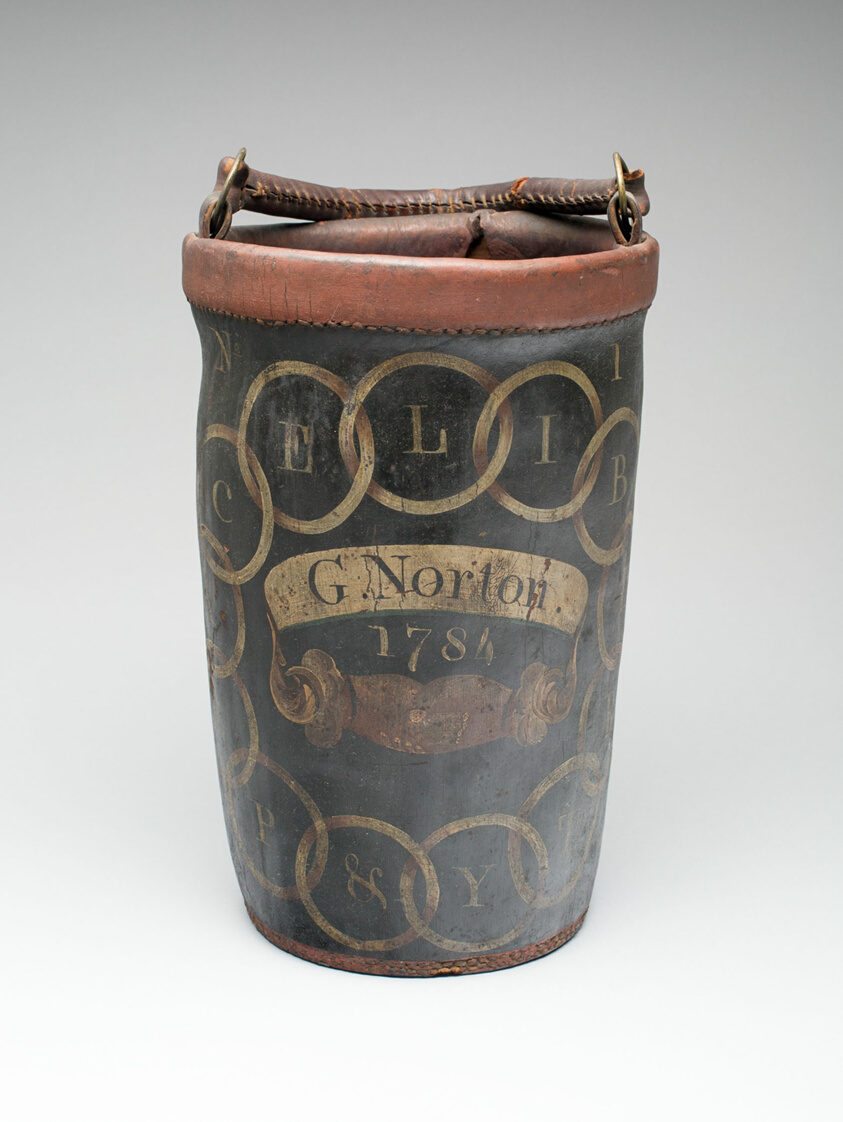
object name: Decorative Arts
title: Fire Bucket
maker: Artist unknown (American, 18th century); Newburyport or Ipswich, Massachusetts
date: 1784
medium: Leather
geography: Newburyport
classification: furniture accessory; vessel; american decorative arts; american arts; decorative arts